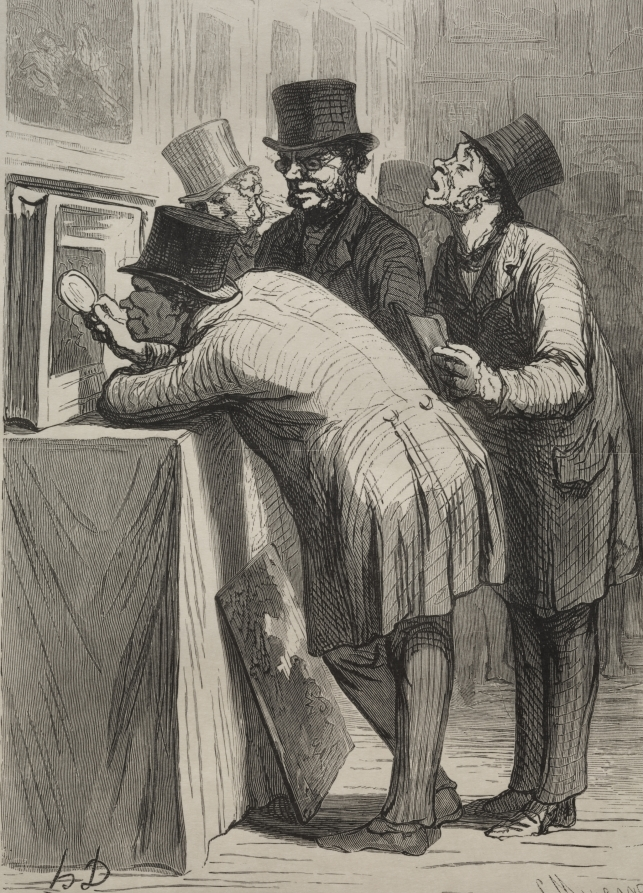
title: Art Lovers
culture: France, 19th century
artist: Honoré Daumier (French, 1808–1879)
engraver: Charles Maurand (French, 1824–1904)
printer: François Louis Schmied (Swiss, 1873–1941)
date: 1863, printed 1920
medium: wood engraving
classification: Print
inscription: Lower margin, pencil: 42/75 ; red stamp: FLS